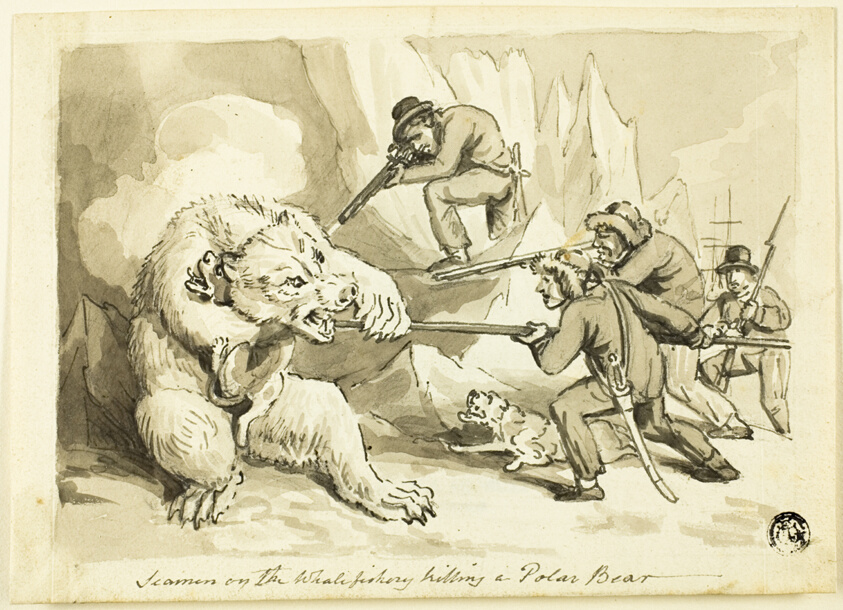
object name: Drawing and Watercolor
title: Seamen on the Whale Fishery Killing a Polar Bear (recto); Shell (verso)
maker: Recto attributed to Samuel Howett (English, c. 1765-1822); Verso by Unkown Artist (British, 19th c.)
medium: Pen and brown ink, with brush and gray and brown wash, over graphite (recto), and print (verso), on ivory wove paper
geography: England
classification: ink or chalk wash; drawings (visual works); prints and drawing